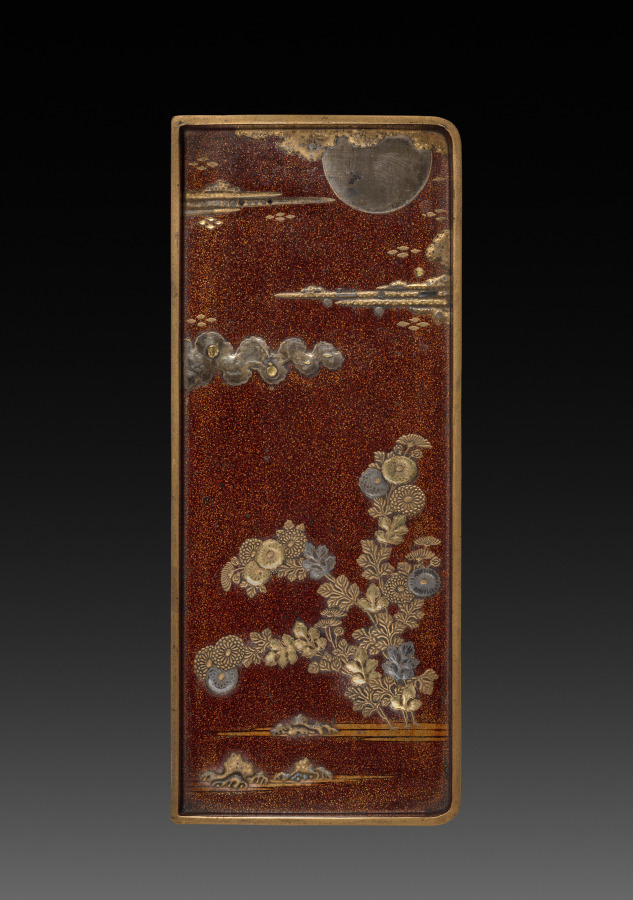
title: Writing Box (Suzuribako) with Phoenix in Paulownia (tray)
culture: Japan, Momoyama period (1573–1615)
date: c. 1573–99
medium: Lacquer on wood with sprinkled gold and silver powder (maki-e) and gold and silver foil application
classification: Lacquer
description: The only place the mythical phoenix will perch is in the paulownia tree. Along with the dragon, the bird is a symbol of imperial power in East Asia. This box––a container for an inkstone, brushes, and ink––is both functional and lavish, its dramatic effects achieved with a pear-skin ground decoration (nashiji) and sprinkled powder decoration in high relief (takamaki-e).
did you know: The only place the mythical phoenix will perch is the paulownia tree.